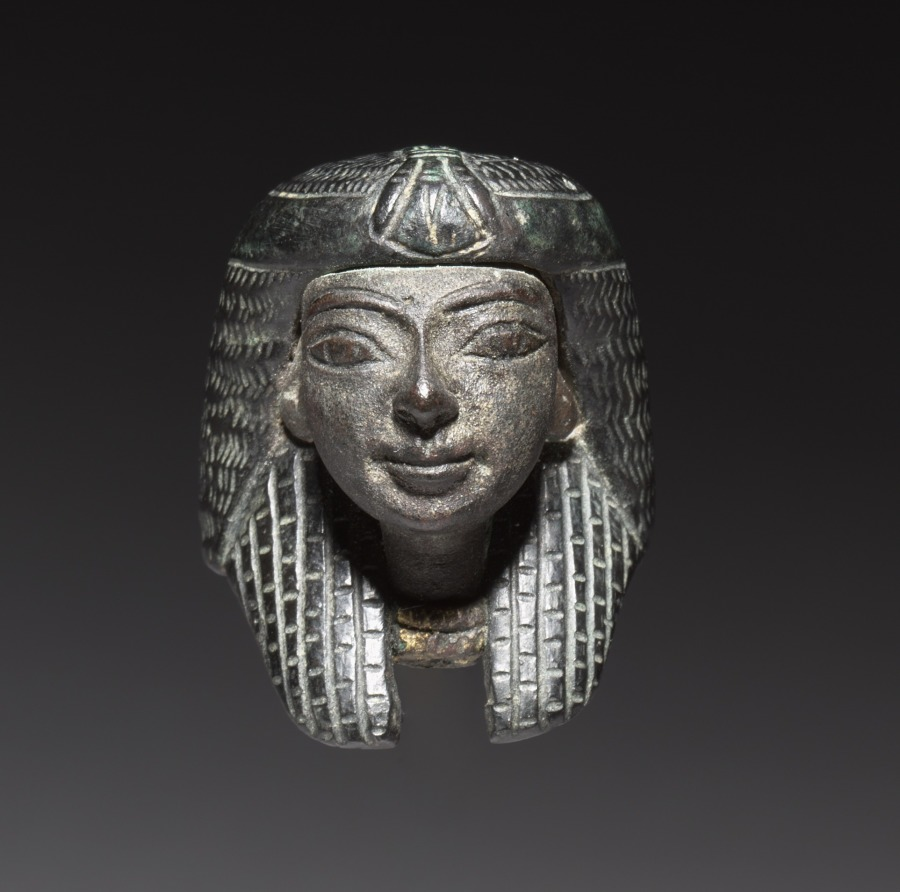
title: Bronze Mount from a "Shawabty Bundle": Head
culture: Egypt, Thebes, Wadi Qubbanet el-Qirud, New Kingdom (1540–1069 BCE), Dynasties 18–19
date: c. 1336–1256 BCE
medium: bronze, black copper wig, traces of gilding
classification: Funerary Equipment